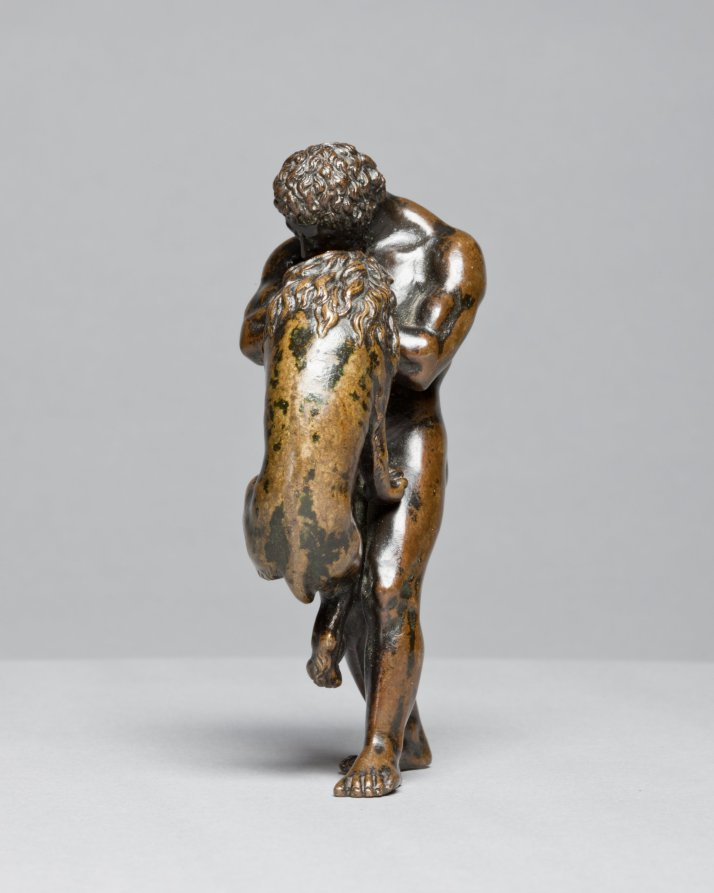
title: Hercules and the Nemean Lion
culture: Italy or France, 16th century or later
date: 1500s or later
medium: bronze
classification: Sculpture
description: The original owner of this work would have understood that this scene referred to the entire story of Hercules, the demi-god who had to accomplish twelve labors. The lion is named after the city of Nemea, near Corinth, a monstrous beast sent by the goddess Hera to wreak havoc on the area. After killing the lion, Hercules wore his pelt, commonly seen in other representations of the hero.